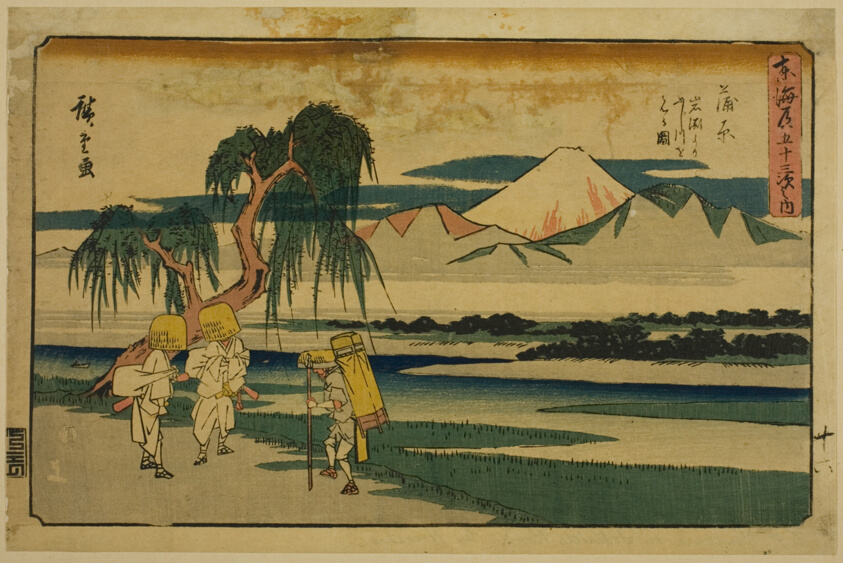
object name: Print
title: Kanbara: View of the Fuji River from Iwafuchi (Kanbara, Iwafuchi yori Fujikawa o miru zu), from the series "Fifty-three Stations of the Tokaido (Tokaido gojusan tsugi no uchi)," also known as the Gyosho Tokaido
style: Japanese (culture or style), edo (japanese period), Japanism, East Asian, asian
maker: Utagawa Hiroshige 歌川 広重; Japanese, 1797-1858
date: c. 1841/44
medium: Color woodblock print; aiban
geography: Japan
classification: woodblock print; print; asian art